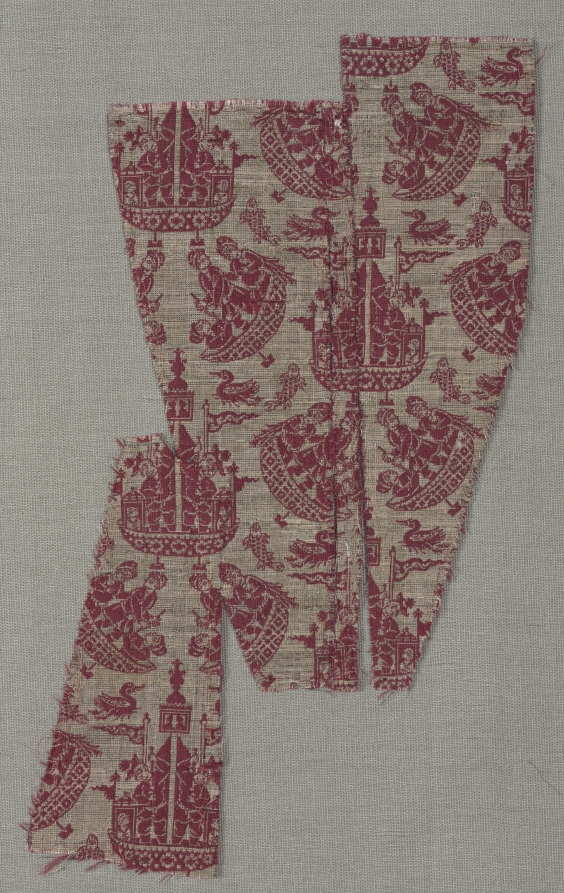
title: Fragment with maritime scene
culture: Iran, Safavid period (1501–1722)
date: late 1600s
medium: silk and silver-metal thread: double cloth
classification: Textile